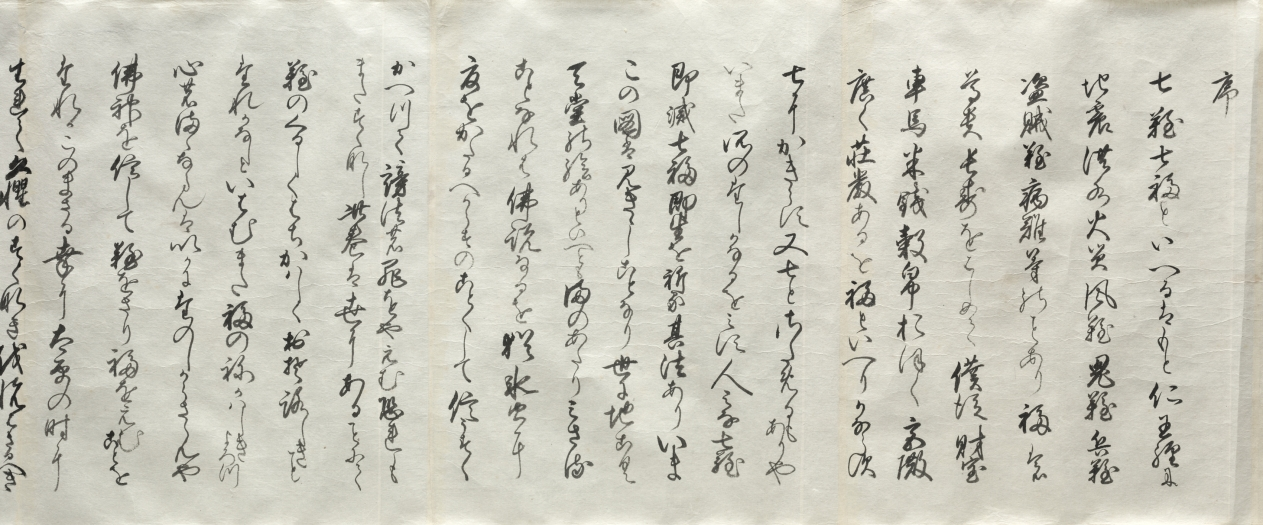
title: Sketch Copy of Natural Disasters, from the Seven Fortunes and Misfortunes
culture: Japan, Edo period (1615–1868) to Meiji period (1868–1912)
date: after 1773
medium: handscroll; ink and color on paper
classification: Painting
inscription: Signed: Gettcho; dated 1773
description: This unmounted handscroll is a copy of the first of a three-scroll set painted by Maruyama Ōkyo (1733–1795) for Buddhist monk Yujō (1723–1773). It depicts people's unfortunate encounters with forces of nature from wind to beasts. Ōkyo's realistic, contemporary imagery was meant to evoke a sense of recognition and empathy in viewers, shocking them into avoidance of possible punishments.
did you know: Notations that appear throughout the scroll indicate colors and other details of the original painting.